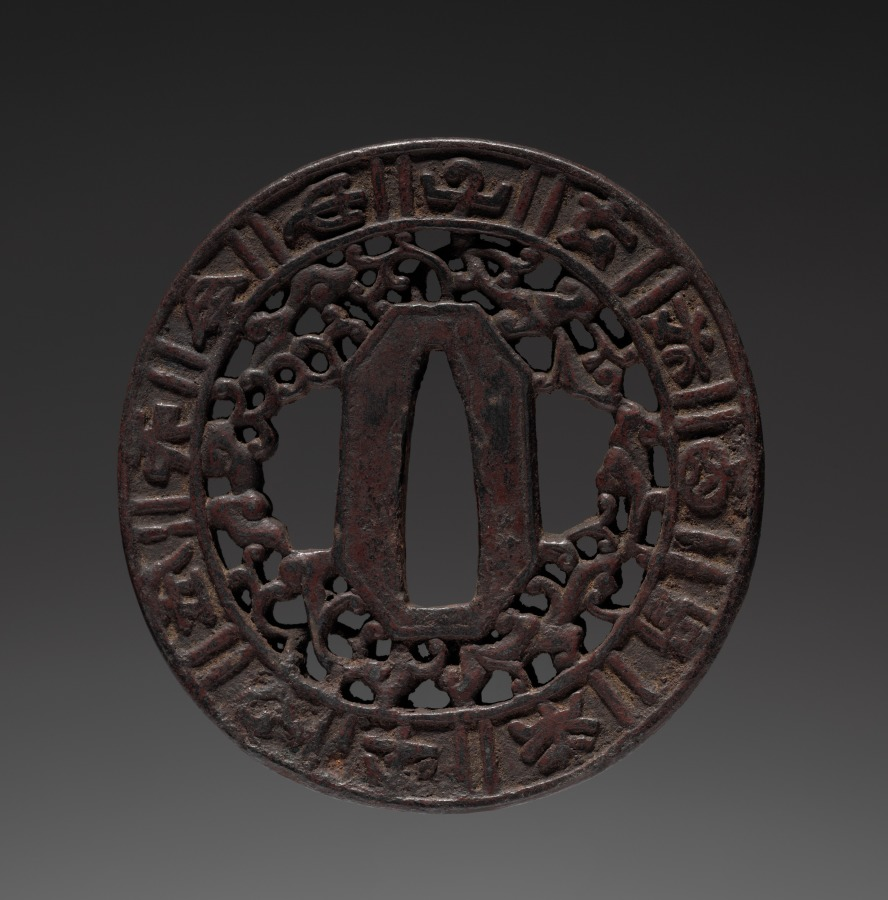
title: Sword Guard (Tsuba)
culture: Japan, possibly Edo period (1615-1868)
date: c. 1615–1868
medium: iron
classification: Arms and Armor